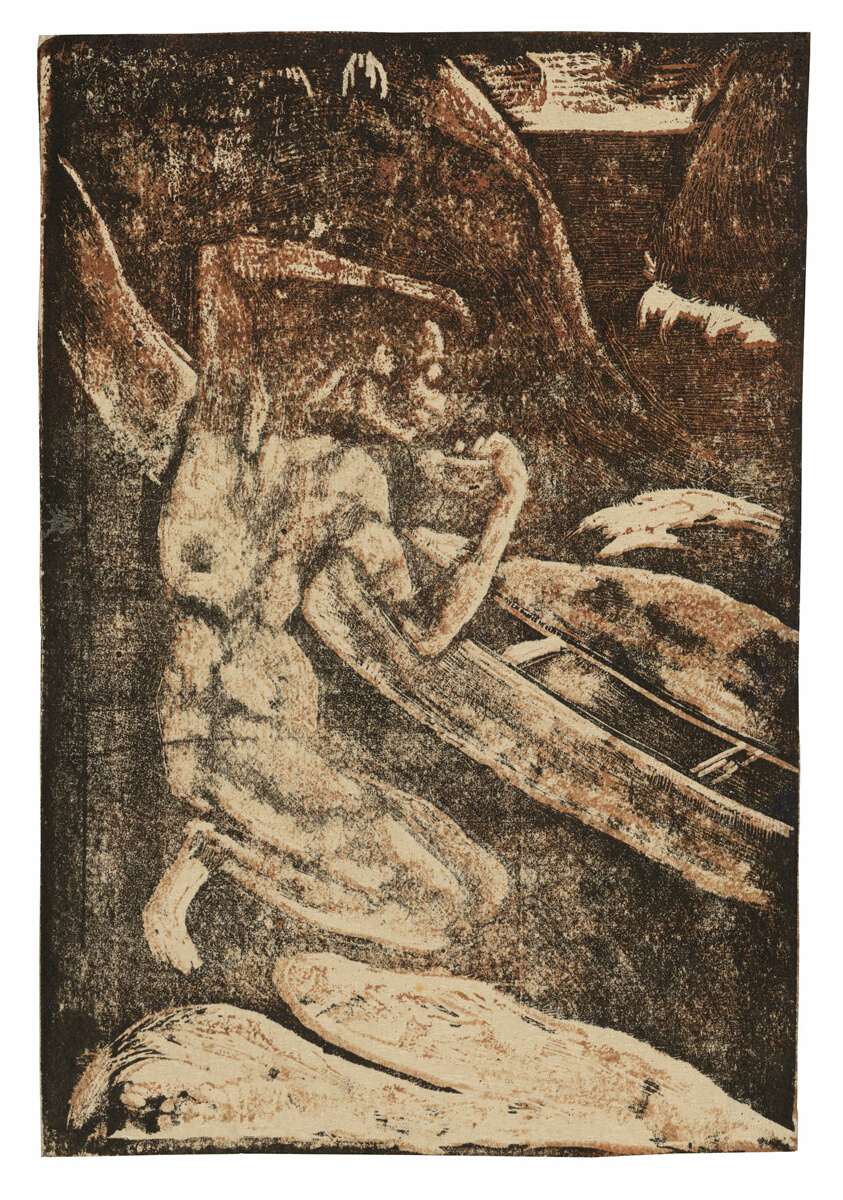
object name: Print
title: A Fisherman Drinking Beside His Canoe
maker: Paul Gauguin (French, 1848-1903)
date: 1894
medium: Wood-block print, printed twice in brown and black ink, on cream wove Japanese paper laid down on cream wove Japanese paper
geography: France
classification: woodcut; print; prints and drawing